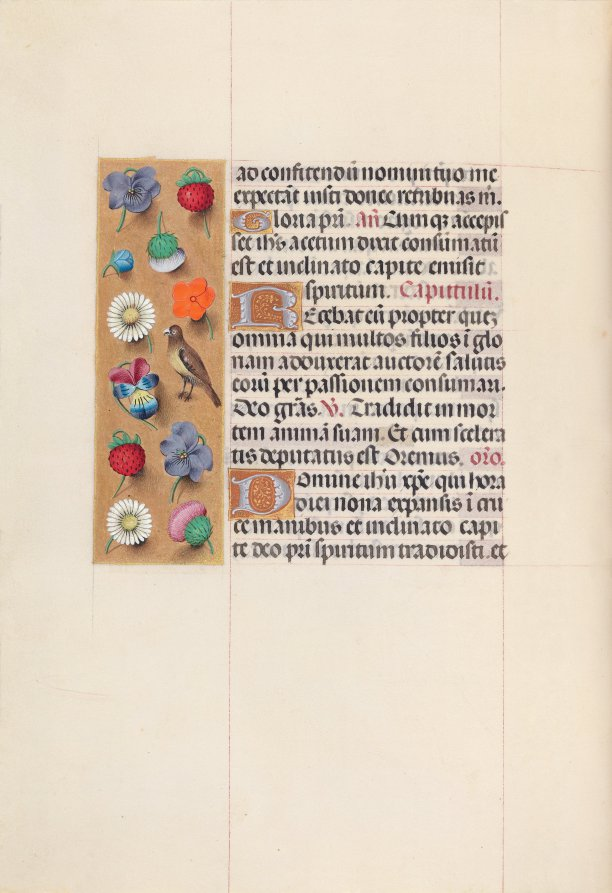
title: Hours of Queen Isabella the Catholic, Queen of Spain: Fol. 70v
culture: Flanders, Ghent and Bruges, late 15th century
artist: Master of the First Prayerbook of Maximillian (Flemish, c. 1444–1519)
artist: and Associates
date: c. 1500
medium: ink, tempera, and gold on vellum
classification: Bound Volume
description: This manuscript was illuminated by a circle of at least five highly organized manuscript painters active in the Flemish cities of Ghent and Bruges. The principal illuminator was Alexander Bening, who painted the majority of the book's miniatures. Manuscripts produced by this circle of artists are renowned for the decoration of their borders, which typically feature a rich variety of realistically-painted flowers, birds, and butterflies. This prayer book, called a book of hours, was intended not for a cleric, but for the private devotions of a lay person-in this case, Isabella the Catholic, Queen of Spain (1451-1504). Isabella's coat of arms embellishes the book's frontispiece. It is unlikely that the book was commissioned by the Queen herself; rather, she probably received it as a diplomatic gift from someone courting her patronage, perhaps Cardinal Francisco Jimenez de Cisneros. A Franciscan friar, Jimenez was dependent upon Isabella for his advancement, first to the post of Queen's confessor in 1492, and then to Archbishop of Toledo in 1495.